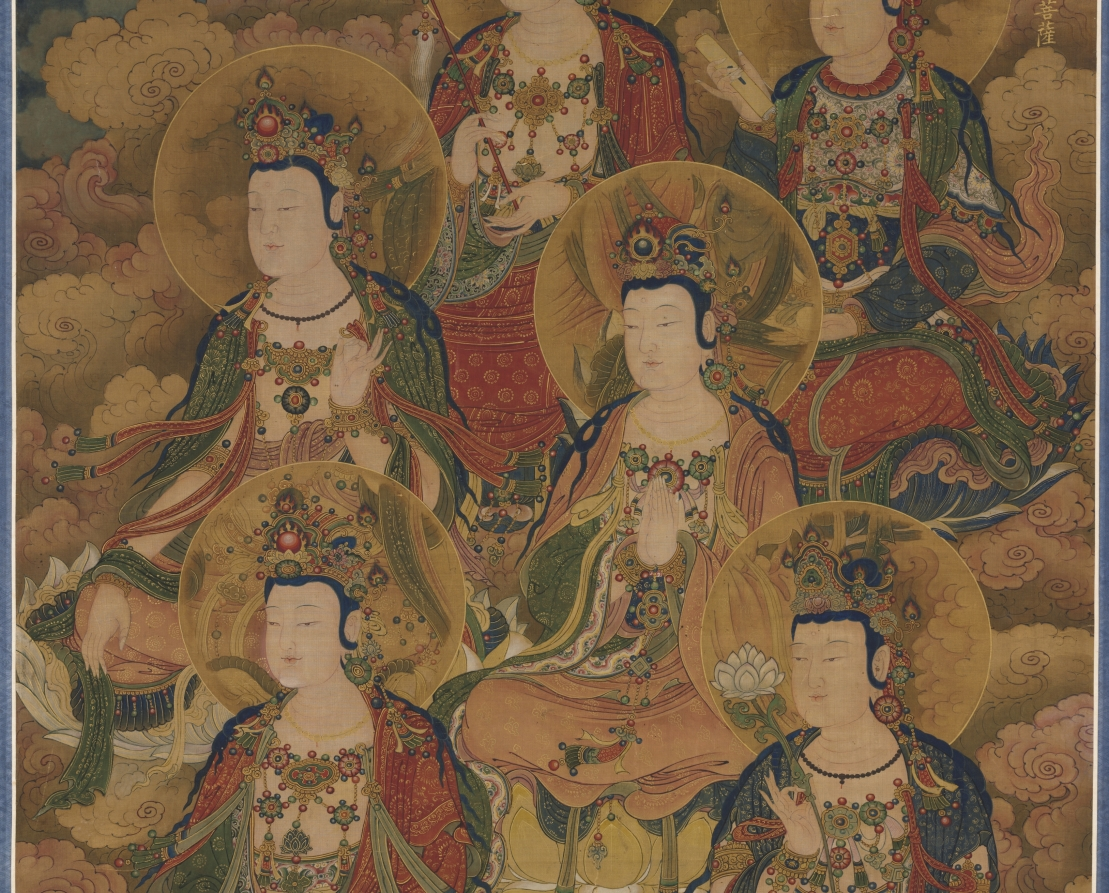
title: The Bodhisattvas of the Ten Stages in Attaining the Most Perfect Knowledge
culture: China, Ming dynasty (1368–1644)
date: 1454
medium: hanging scroll; ink and color on silk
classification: Painting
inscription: 大明景泰五年八月初三日施 [印] 廣運之寳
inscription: 御用監太監尚義王勤等奉命提督監造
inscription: 等覺位十地菩薩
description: This painting represents bodhisattvas of the 10 stages of enlightenment undergoing the final processes toward Buddhahood. This and CMA 1973.70.2 form part of a set of scrolls that were used to perform the Water-Land (shuilu) ritual. The sinuous curves of scarf and drapery, the layering of garments, and the minute detail all reflect the opulent visual atmosphere that surrounded the Ming worshipper in temples and spirit halls throughout the country. In the upper right corner of each painting is an imperial seal and an inscription in gold: Donated on the third day of the eighth month in the fifth year of the Jingtai reign (1454) of the Great Ming. Written in ink in the lower left corner is the record that they were made on imperial order, probably to present them to the Da Longfu monastery in Beijing.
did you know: This painting was used in the grandest of the Buddhist mortuary rites, the Water-Land (shuilu) ritual, which was conducted for the salvation of “all souls of the dead on land and sea.”